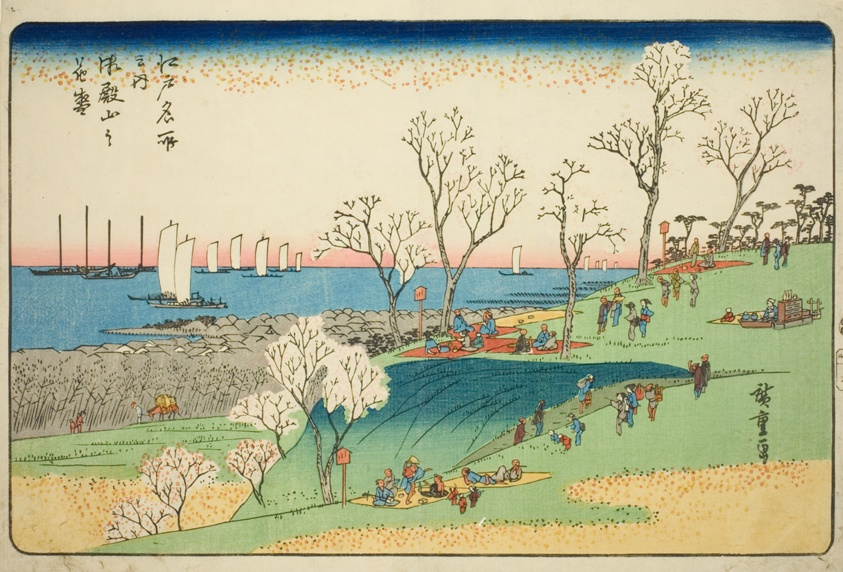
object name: Print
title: Cherry Blossoms in Full Bloom at Goten Hill (Gotenyama no hanazakari), from the series "Famous Places in Edo (Edo meisho no uchi)"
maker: Utagawa Hiroshige 歌川 広重; Japanese, 1797-1858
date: c. 1832/34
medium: Color woodblock print; oban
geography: Japan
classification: woodblock print; print; asian art